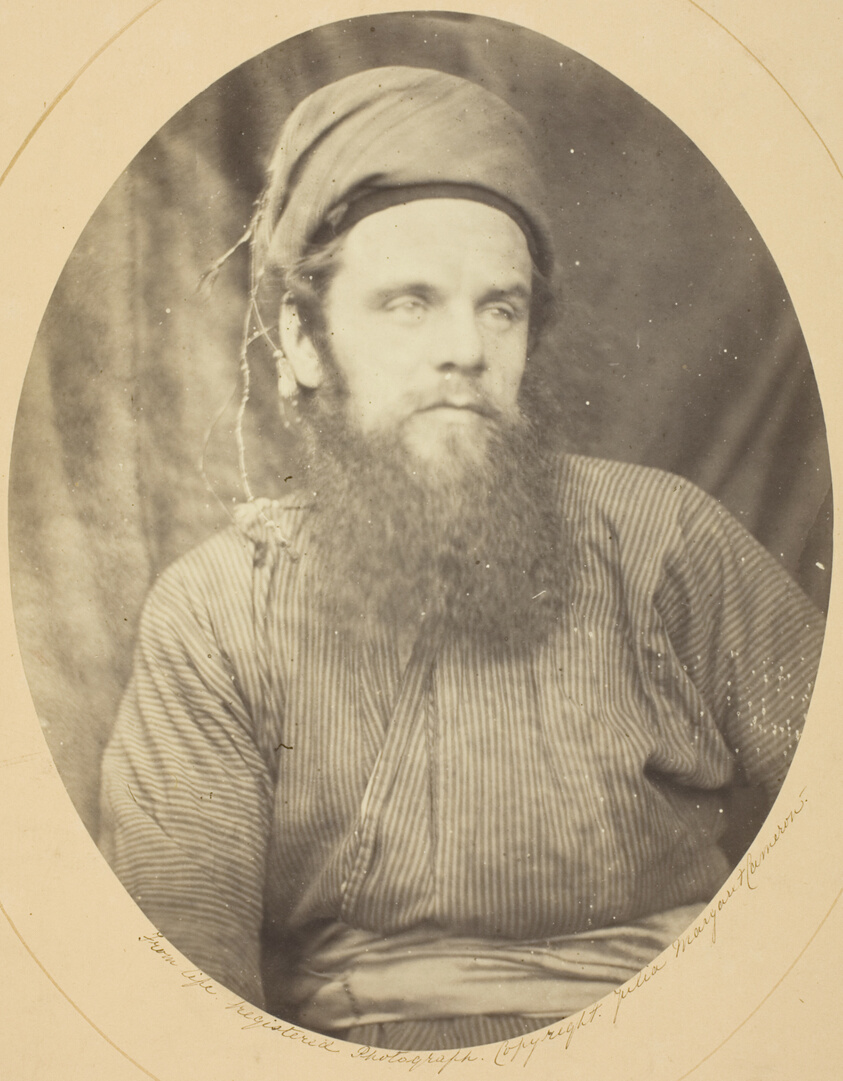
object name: Photograph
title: William Holman Hunt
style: 19th century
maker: Julia Margaret Cameron (English, 1815–1879)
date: 1864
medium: Albumen print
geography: England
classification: albumen silver print; photographic process; photography; photograph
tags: portraits, portraits: male subject, photography